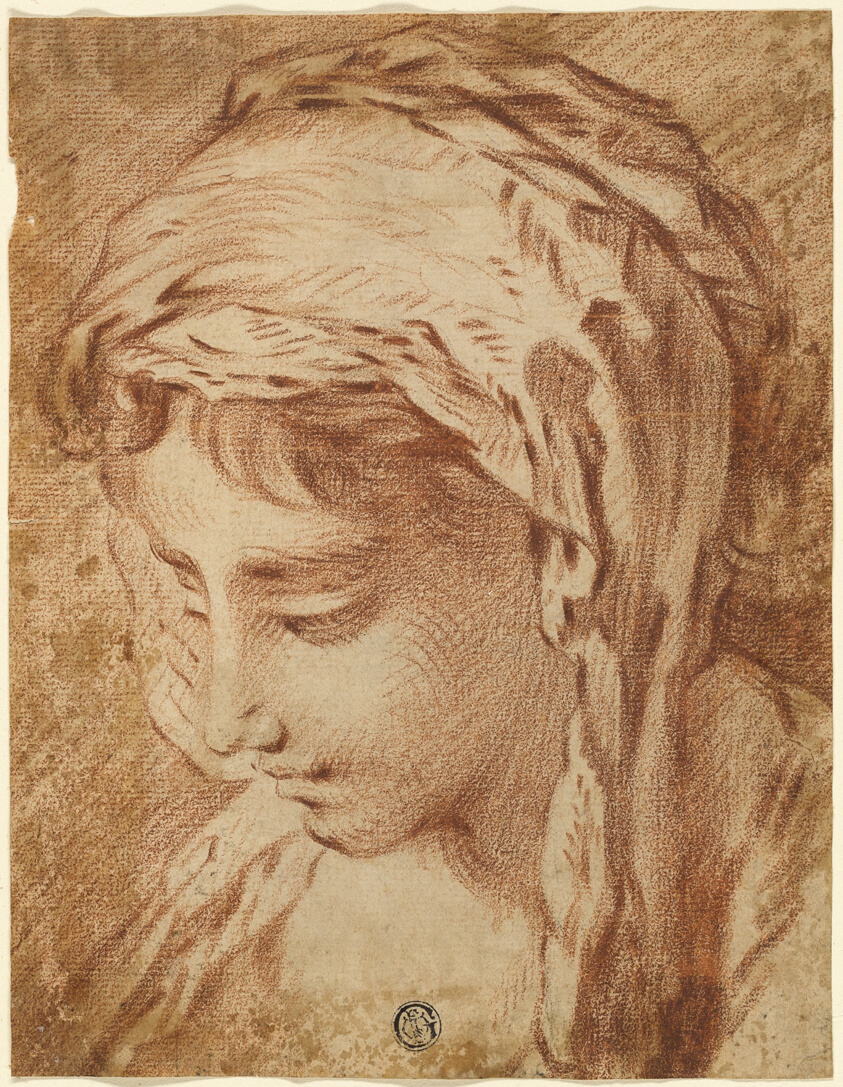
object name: Drawing and Watercolor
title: Head of a Woman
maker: Attributed to François Boucher; French, 1703-1770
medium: Red chalk, over traces of graphite, on ivory laid paper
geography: France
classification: chalk; drawings (visual works); prints and drawing